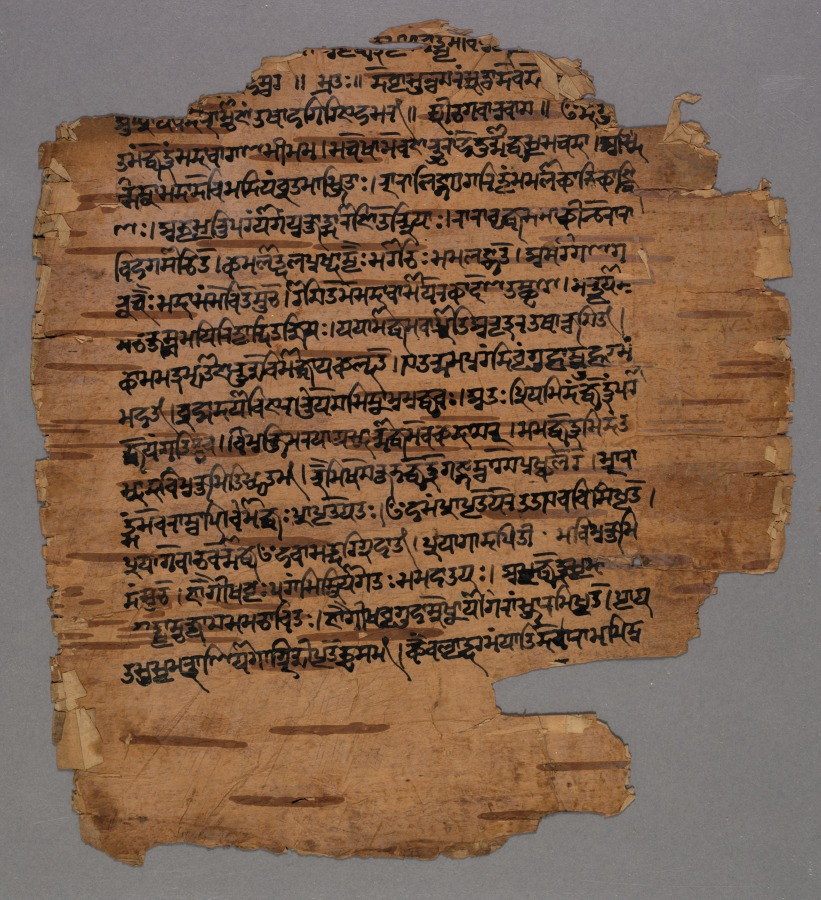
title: Sarada Script (?)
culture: India or Kashmir, probably 17th century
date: 1600s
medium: ink on paper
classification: Manuscript